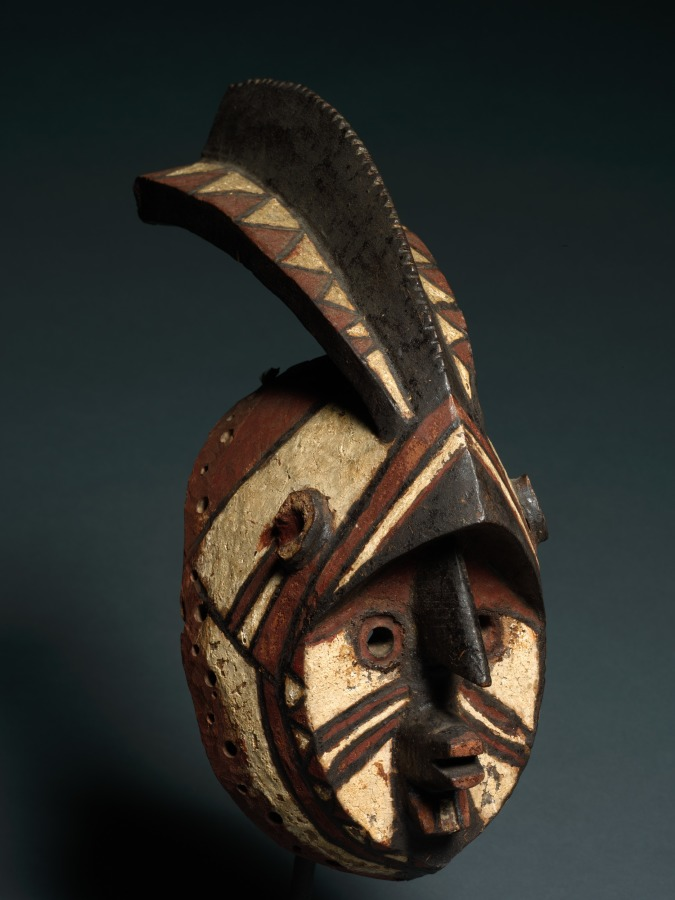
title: Mask (wan-balinga)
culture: Africa, West Africa, Burkina Faso, Mossi-style blacksmith-carver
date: early 1900s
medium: Wood and paint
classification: Mask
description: Only the farmers among the Mossi people employ masks. This mask’s proper name, wan-balinga, evokes a mythical figure who was the mother of the first Mossi ruler. Such masks are most typically worn and danced with on the occasion of the funeral of a male or female elder as escorts of the corpse to the grave. They also appear during annual memorial services that occur months after the actual burial, when all the deceased clan members are commemorated and honored.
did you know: This mask was worn and danced upon the death of an elder, escorting the corpse to the grave.